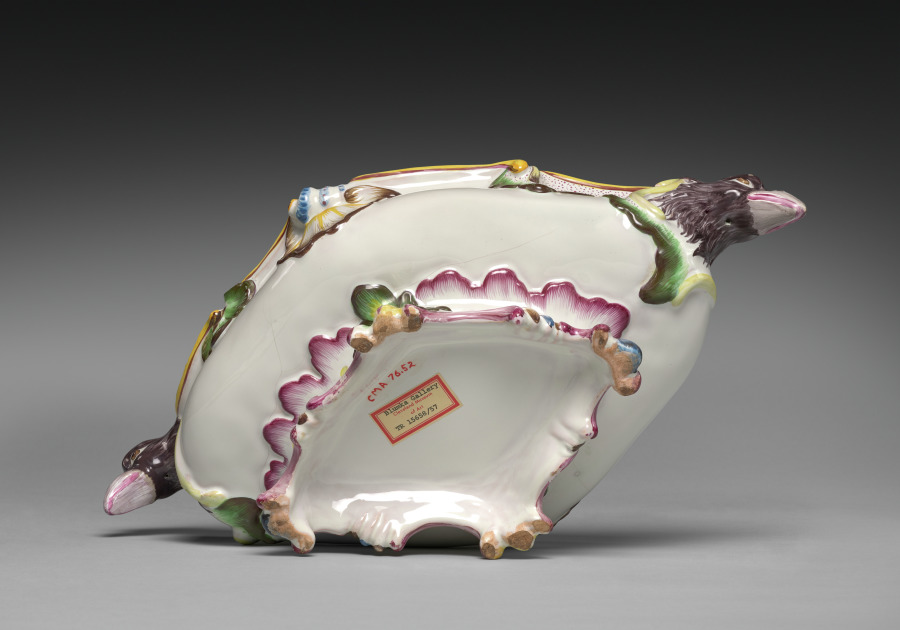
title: Tureen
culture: France, Strasbourg, 18th century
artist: Strasbourg Factory (France)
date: c. 1750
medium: tin-glazed earthenware (faience) with enamel decoration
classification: Ceramic